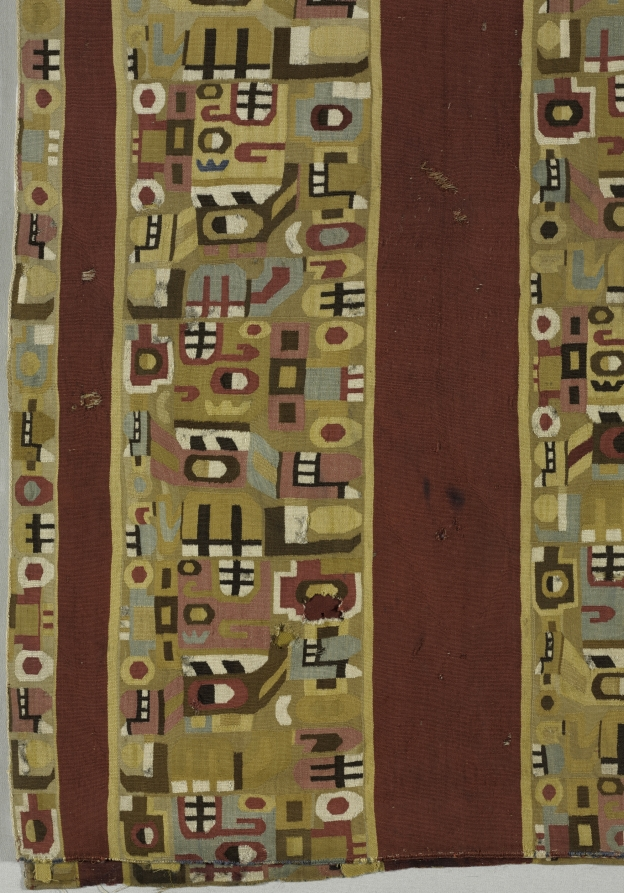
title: Tunic with Sacrificer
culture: South America, Peru, Central Andes, Middle Horizon, Wari people, 7th-11th century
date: 600–1000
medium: camelid-fiber, cotton; tapestry weave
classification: Textile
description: An extremely abstract supernatural sacrifice repeats in different colors and orientations across the body of this tunic, which was shortened on one side in antiquity. Look for the toothy black-and-white mouth in the sacrificer's upward-gazing head; other facial features include a button nose and a vertically divided eye. The figure holds the L-shaped haft of an axe behind its back and, at the front of its body, a short staff with a severed, upside-down human head on the top.